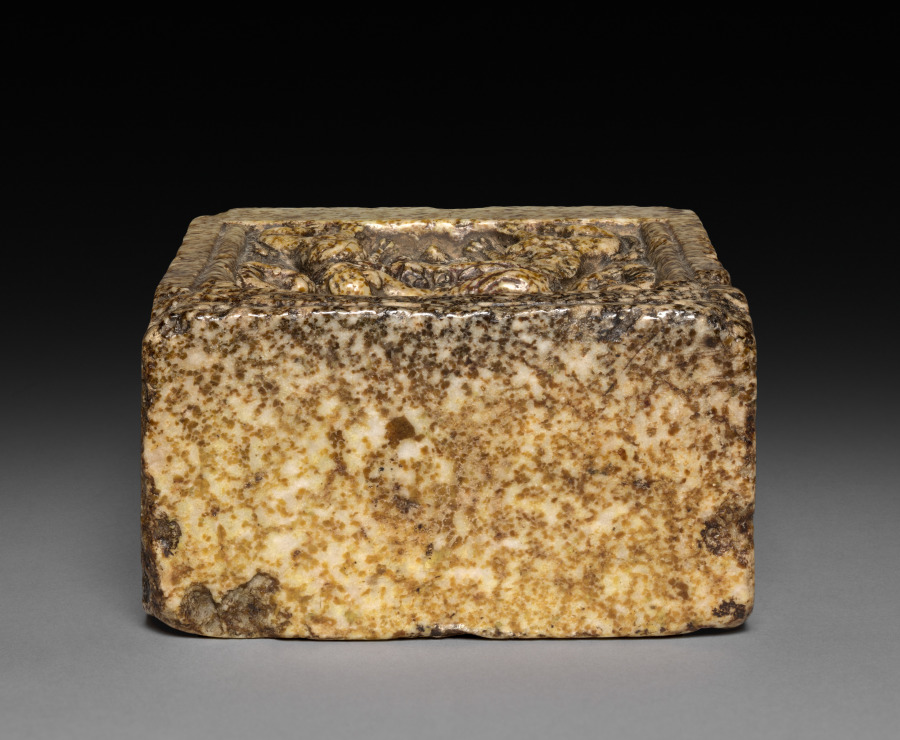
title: Sakyamuni Preaching: A Votive Stele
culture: China, Northern Dynasties period (386–581 CE), Northern Zhou (557-581)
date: c. 565 BCE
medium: Serpentinite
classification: Sculpture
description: The stele shows the historic Buddha Sakyamuni preaching, his lotus throne being flanked by lions, two attendants, and two disciples. There is a date and inscriptions on both sides of the stone.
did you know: Originally the figures and background were painted; traces of red and black remain. The figures’ clothing and some exposed skin were gilded.